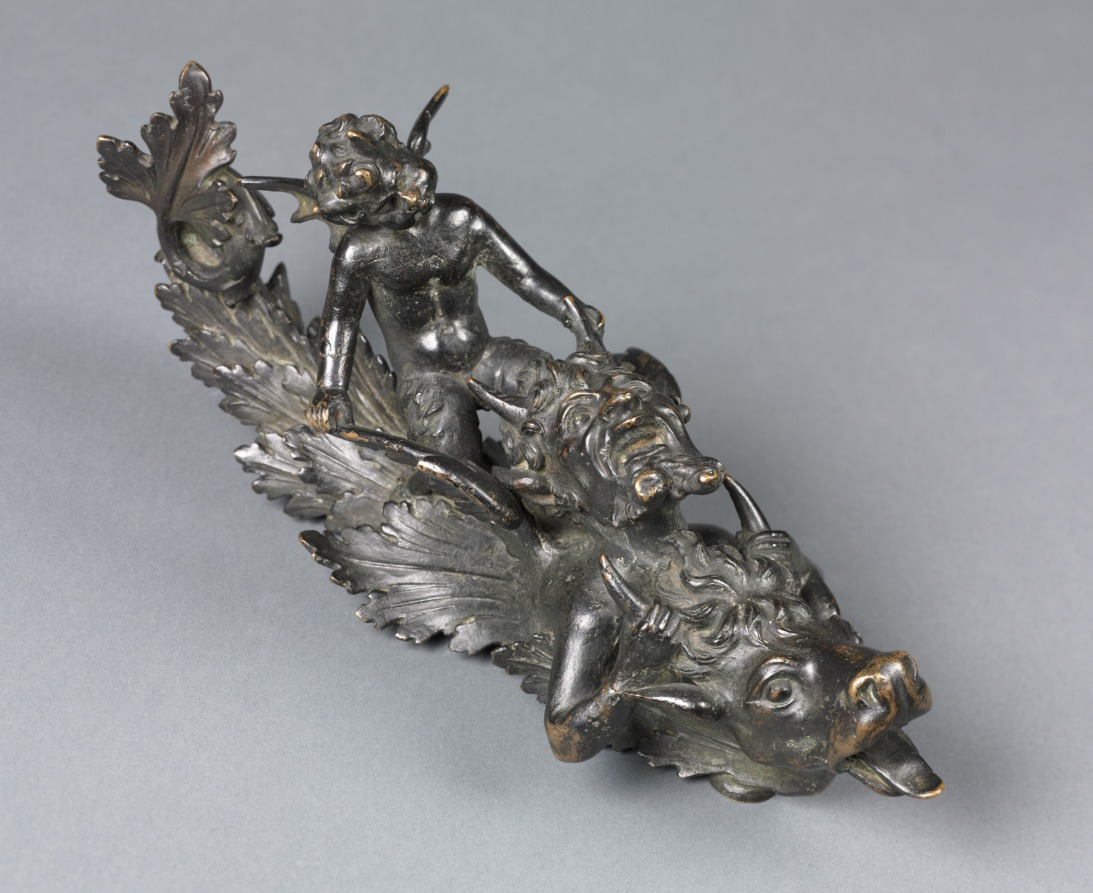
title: Doorknocker with Two Satyrs Riding an Ox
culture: probably Italy, Style of Padua, 16th Century, 19th century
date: 1800s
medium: bronze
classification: Sculpture